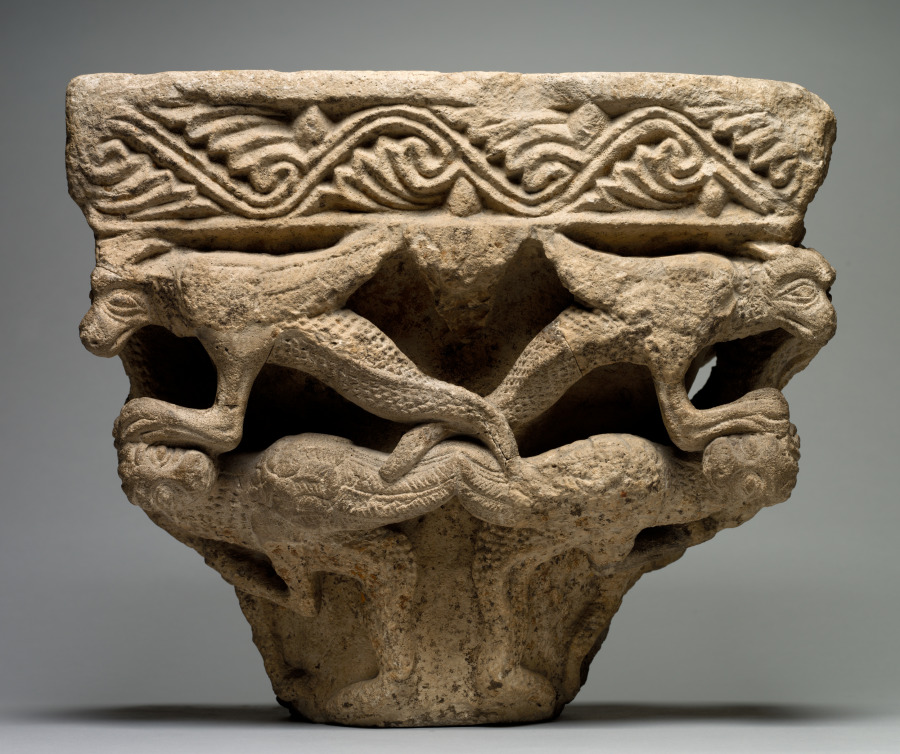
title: Capital with Dragons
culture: Southwest France, Languedoc, Toulouse (?), 13th century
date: 1200s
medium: limestone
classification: Sculpture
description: Monstrous images were prevalent in the decoration of religious buildings during the Middle Ages. Such images must have impressed, perhaps even terrified, the monks and visitors who spent much of their time within the cloister or church, a place of prayer, contemplation, and reflection. Scholars have speculated how such images would have been received by the people given the ubiquity of monsters in medieval society. The carved monsters, often symbolizing vice and retribution for sin, were possibly designed to provoke a range of emotional responses including laughter, wonder, surprise, fear, and shock. This striking imagery must have had a strong impact, which in turn led Saint Bernard of Clairvaux (1090–1153), the spiritual head of the Cistercian order, to admonish their use as distracting from prayer.